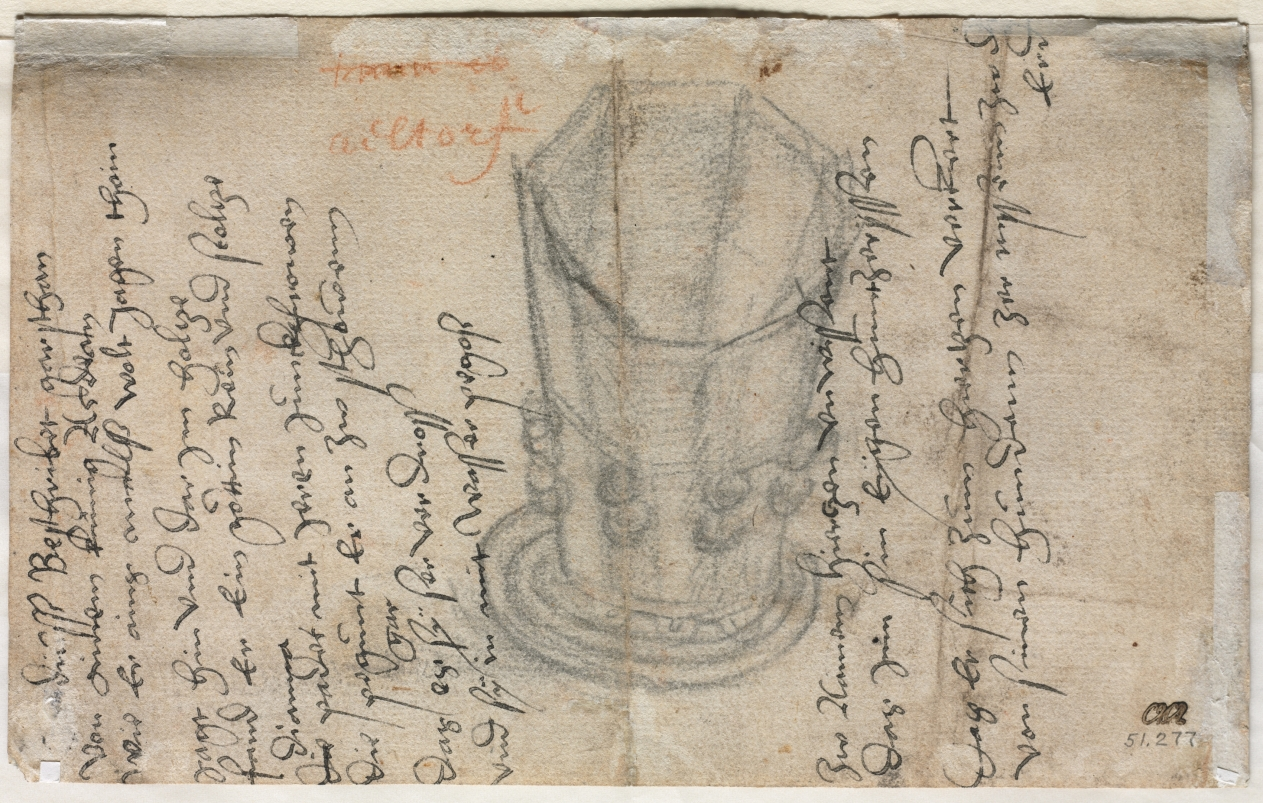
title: Eight-Sided Cup (verso)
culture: Austria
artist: Wolfgang Huber (Austrian, 1490–1553)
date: 1513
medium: charcoal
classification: Drawing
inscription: verso: by artist?, across entire sheet, in black ink: [Ov]iduss Beschribet gar schon / Von einem Cunig Akteon / Wie er aing malß wolt jagen thain / jagt hin und da jm Holtze / fand er ein Göttin Rein vnd stoltze / Diana / die padet mit jeren junkfrauen / die pegünnt er an zu schowen / Daß es sie ser verdross / sy in mit Wasser pegoss / Zw [illegible] Hirschen un wissent / daß jm sin eigen Hünt zeryssen / Daß er sich zum Hirschen verkert / von seinen Hunden zerrissen zu d[illegible] / Erd [sideways]; upper center, in red chalk: [illegible, crossed out] / adltof.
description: This drawing depicts a castle in Southern Germany in the area around the Danube River known for its wooded and rocky heights and dramatic views. Wolfgang Huber's meandering, pen and ink lines describe the contours of the earth and the lushness of summer foliage in a horizontal layout that focuses on the middle distance with a barely recorded foreground. Huber may have made the drawing during a journey between Feldkirch and Vienna as he traveled along the Danube. In 1513 when this drawing was made, landscape was rarely depicted as a subject in and of itself, but artists in the Danube region such as Huber exhibited a profound sensitivity to nature. A drawing on the reverse of the sheet depicts a cup studded with gems and a poem written in a contemporary hand telling the mythological story of Actaeon's transformation into a stag when he intruded upon the goddess Diana and her nymphs bathing.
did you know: This sheet of paper, with drawings on both sides, as well as a poem, shows how artists in the Renaissance rarely wasted paper.